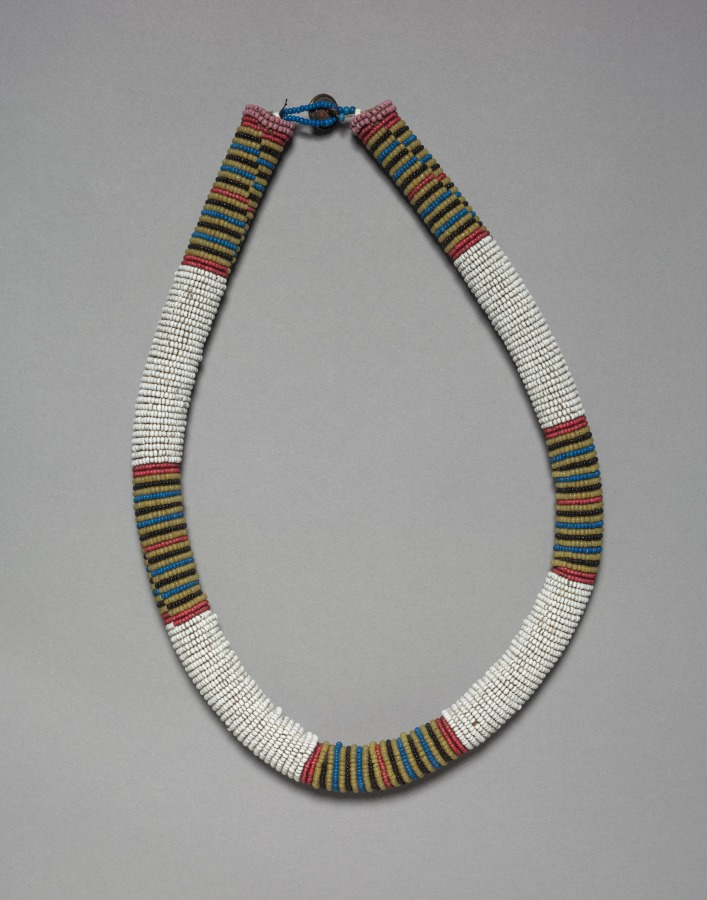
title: Beaded Necklace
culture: Southern Africa, South Africa, Zulu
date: by 1942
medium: Plant fibers, glass beads, possibly sinew, and copper alloy button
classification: Jewelry